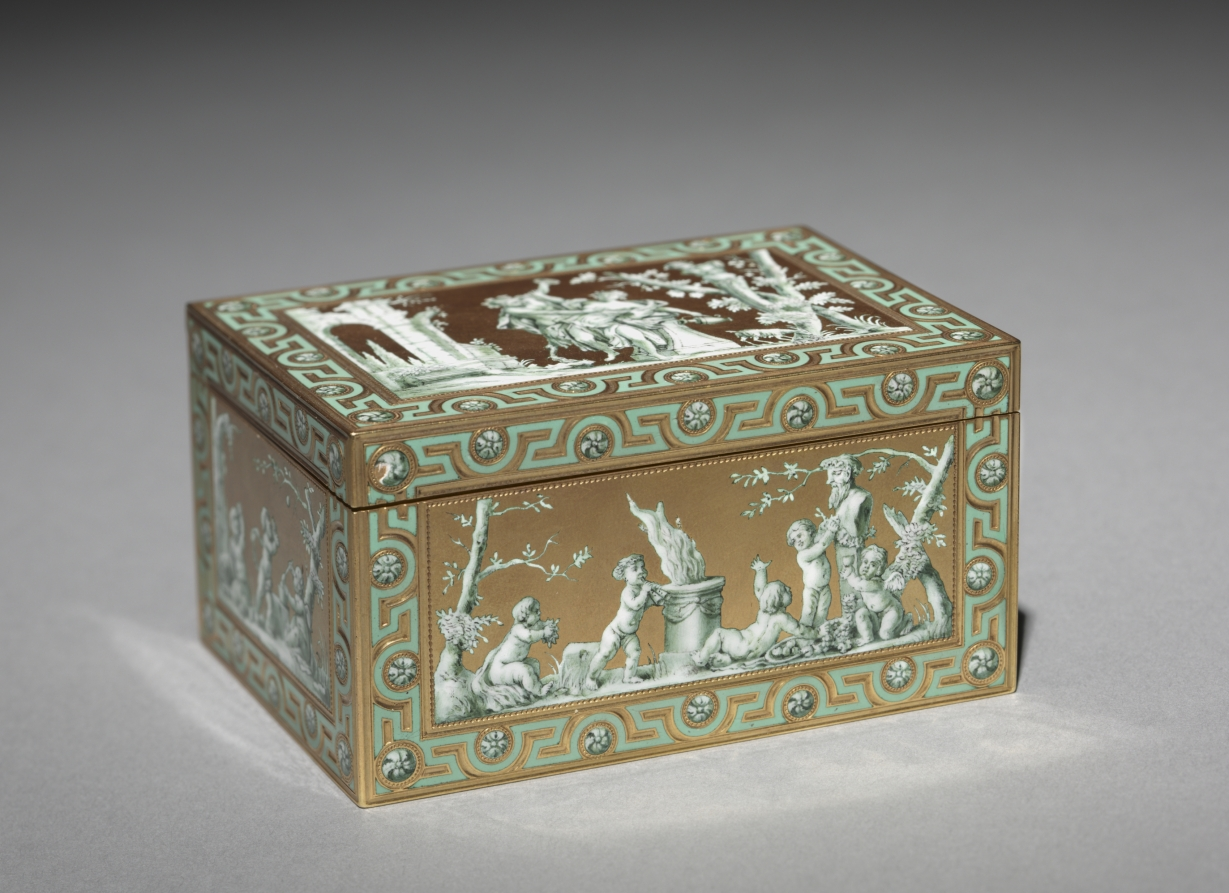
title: Box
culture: France, 18th century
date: c. 1768–1769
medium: gold and enamel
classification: Enamel